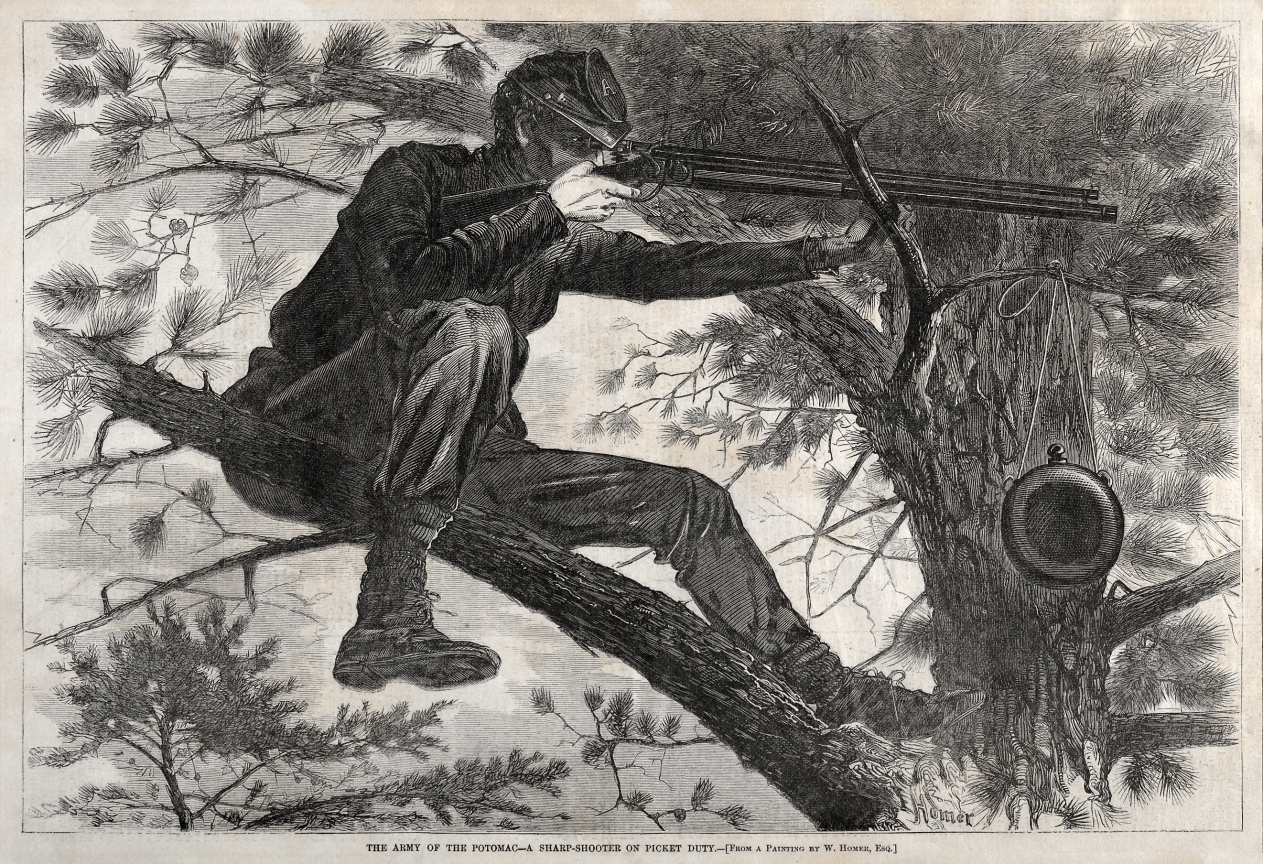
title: The Army of the Potomac - A Sharpshooter on Picket Duty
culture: America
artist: Winslow Homer (American, 1836–1910)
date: 1862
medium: wood engraving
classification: Print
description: Although now most famous as a painter, Homer was also a graphic artist throughout his career and from 1857 provided illustrations for the New York-based Harper's Weekly. When the Civil War began in 1861, the magazine sent Homer to Virginia, where he made numerous drawings of the military. He seldom depicted actual fighting, instead candidly describing everyday camp life. The drawings were reproduced as wood engravings (professionals cut the blocks), the technique used to reproduce illustrations in magazines and books before the development of photomechanical processes.